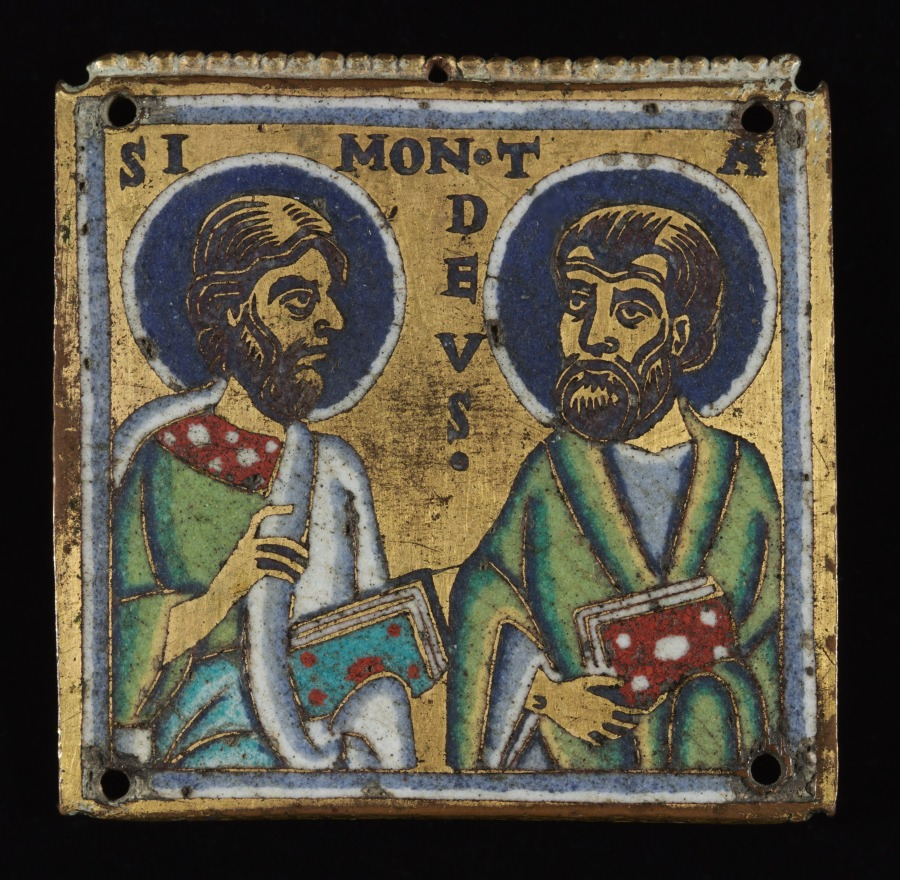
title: Plaque Pair: Simon and Thaddaeus and Thomas and Matthew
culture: Mosan, Valley of the Meuse, Romanesque period, 12th century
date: c. 1160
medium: gilded copper, champlevé enamel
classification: Enamel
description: It is likely this pair of enamel plaques depicting the apostles Simon with Thaddeus and Thomas with Matthew once formed part of the decoration of a portable altar, a reliquary triptych, or some other kind of liturgical object.